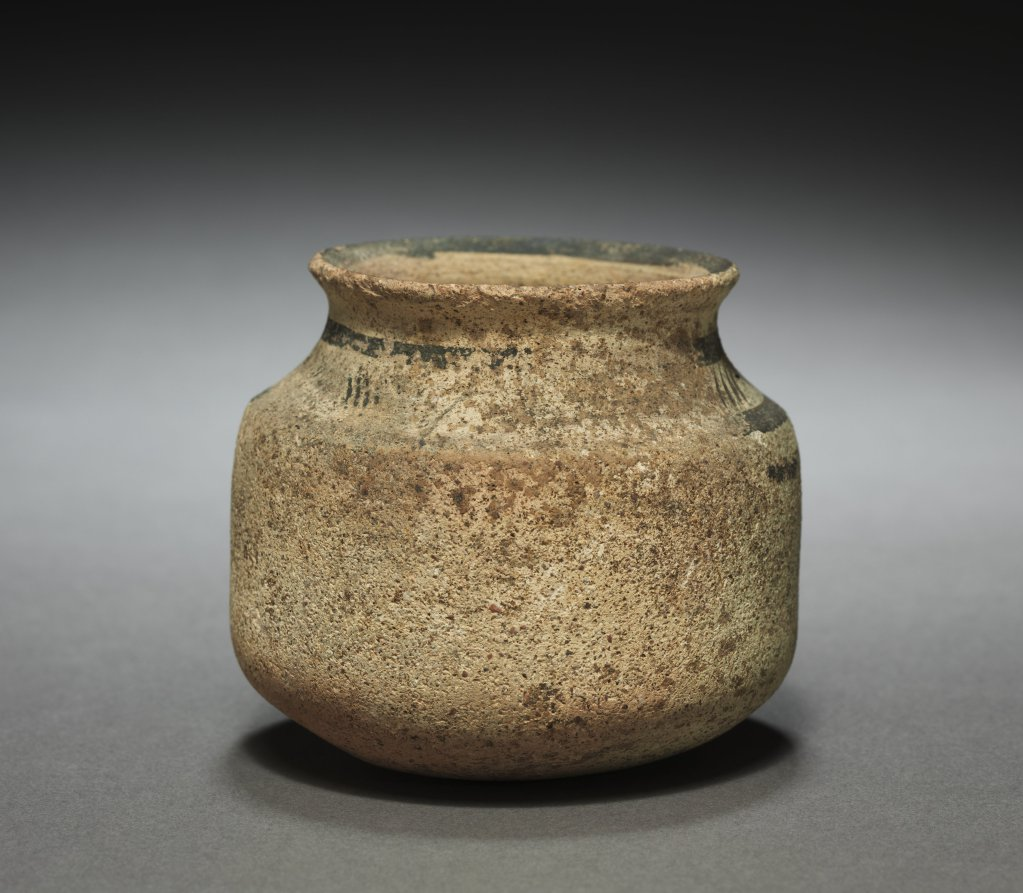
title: Pot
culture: Iran, Luristan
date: 3000–2000 BCE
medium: earthenware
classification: Ceramic